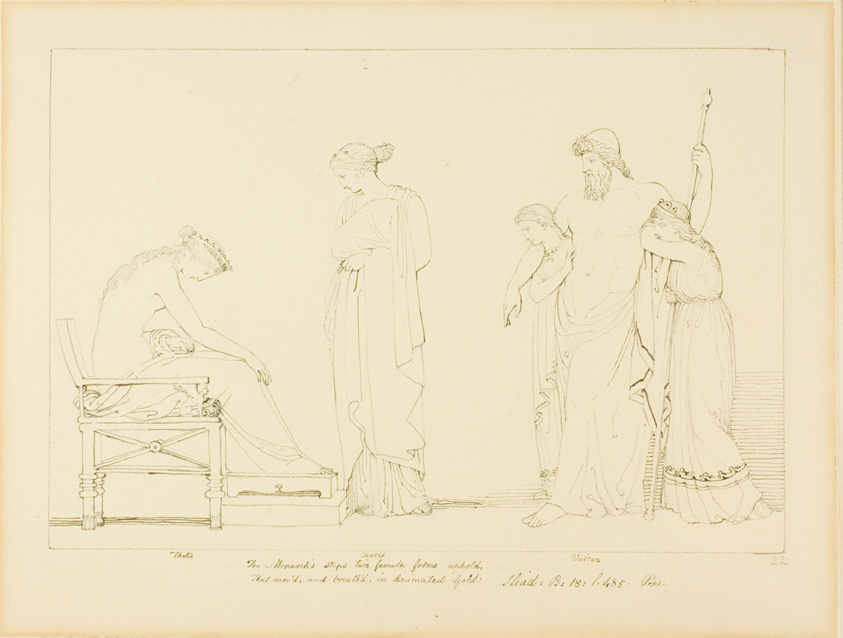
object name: Drawing and Watercolor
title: Vulcan and Thetis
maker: John Flaxman, II; English, 1755-1826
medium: Pen and ink on paper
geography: England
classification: pen and ink drawings; drawings (visual works); prints and drawing